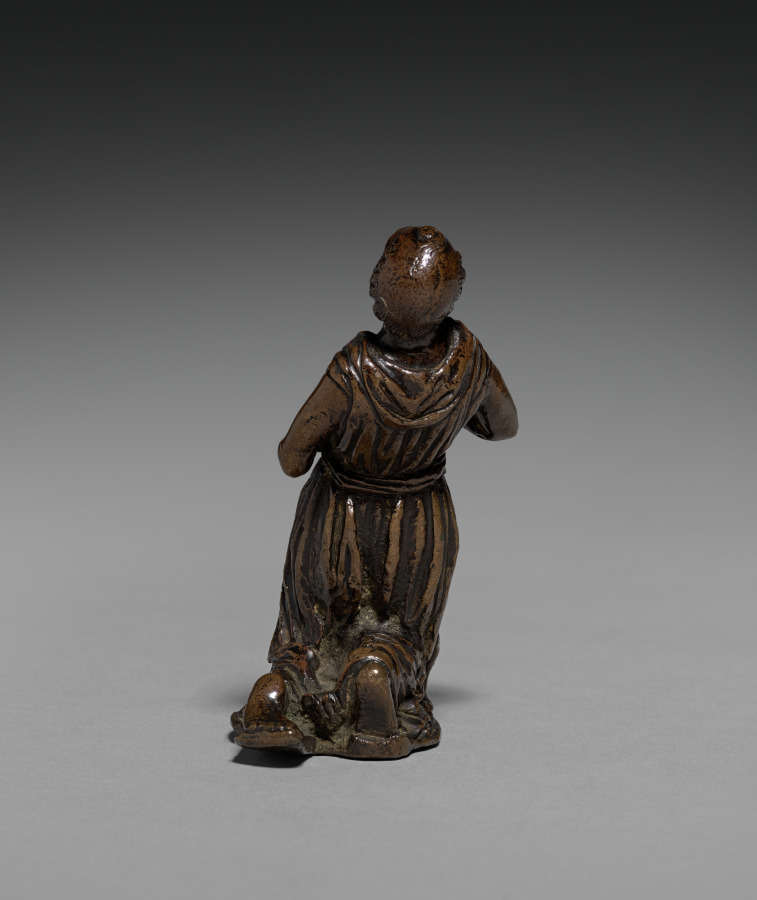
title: Kneeling Saint Jerome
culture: Italy, Ravenna, 16th century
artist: workshop of Severo da Ravenna (Italian, c.1496–c.1543)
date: c, 1525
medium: bronze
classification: Sculpture